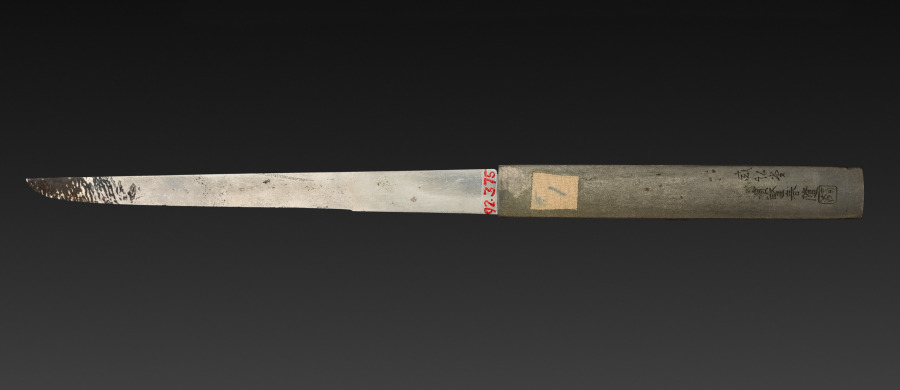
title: Blade with Handle (Kozuka)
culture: Japan, Edo period (1615–1868)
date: 1615–1868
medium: metal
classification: Metalwork